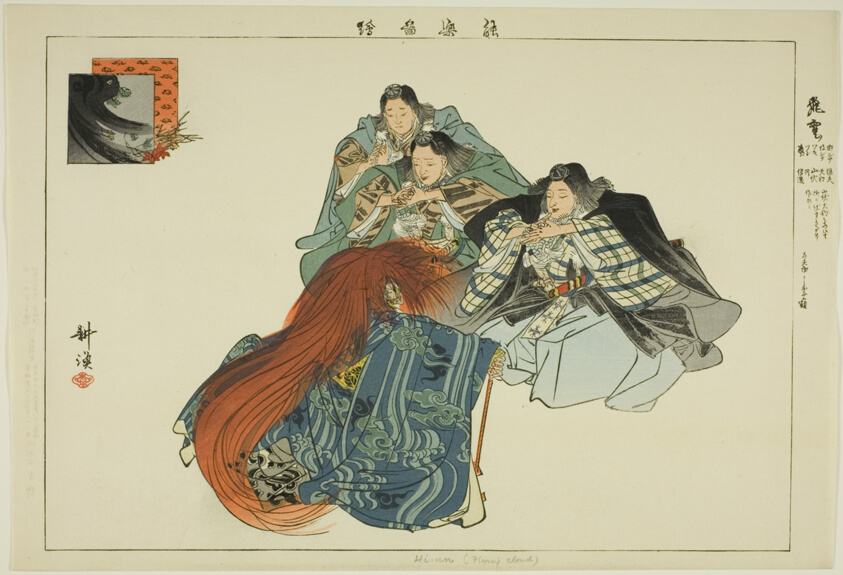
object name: Print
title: Hiun, from the series "Pictures of No Performances (Nogaku Zue)"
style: Japanese (culture or style)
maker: Tsukioka Kogyo; Japanese, 1869-1927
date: 1898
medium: Color woodblock print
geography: Japan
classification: woodblock print; print; asian art